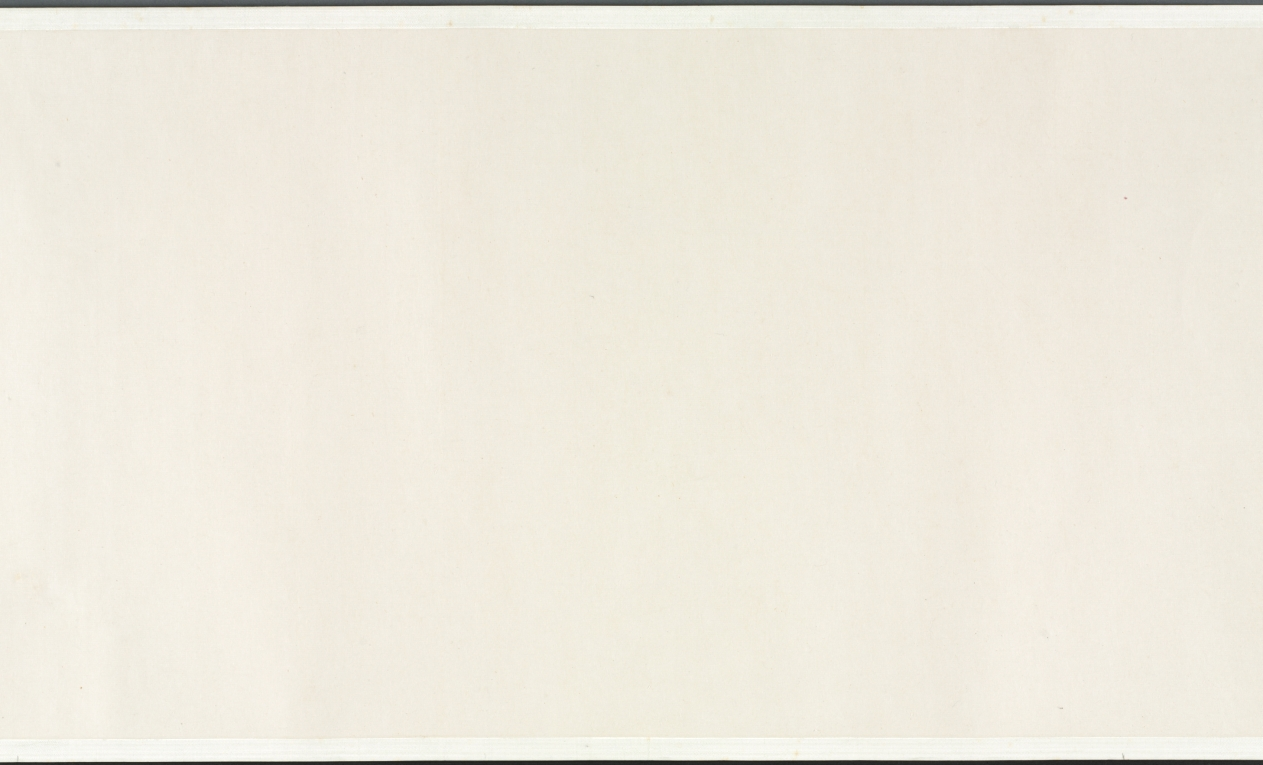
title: Buddha's Conversion of Five Bhiksu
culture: China, Yuan dynasty (1271–1368)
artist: Li Sheng (Chinese, active c. 1324–after 1375)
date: mid-1300s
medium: handscroll; ink on paper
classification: Painting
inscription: 紫篔生李升識 [印] 李氏子雲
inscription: 4 colophons and 12 additional seals: The "Heart" Sutra (Maha Prajnaparamita) text written by Wu Yuqing 吳餘慶 (active early 1400s); 2 seals of Xu Qianxue 徐乾學 (1631–1694); 3 colophons, one dated 1929 and two dated 1936, and 9 seals of Wu Hufan 吳湖帆 (1894–1968); 1 colophon, dated 1932, of Chen Dingshan; 1 seal unidentified.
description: This episode stems from the life of the historical Buddha, who, after his enlightenment, was initially hesitant about preaching his own doctrine. After much personal deliberation and prodding by deities, he finally relented. The first converts were the five guards who served him when he was still a prince. For Li Sheng, this is the pretext of the painting, which moves from the interaction of the bhiksu with the Buddha to a broader awareness of the vast surroundings of the scene.